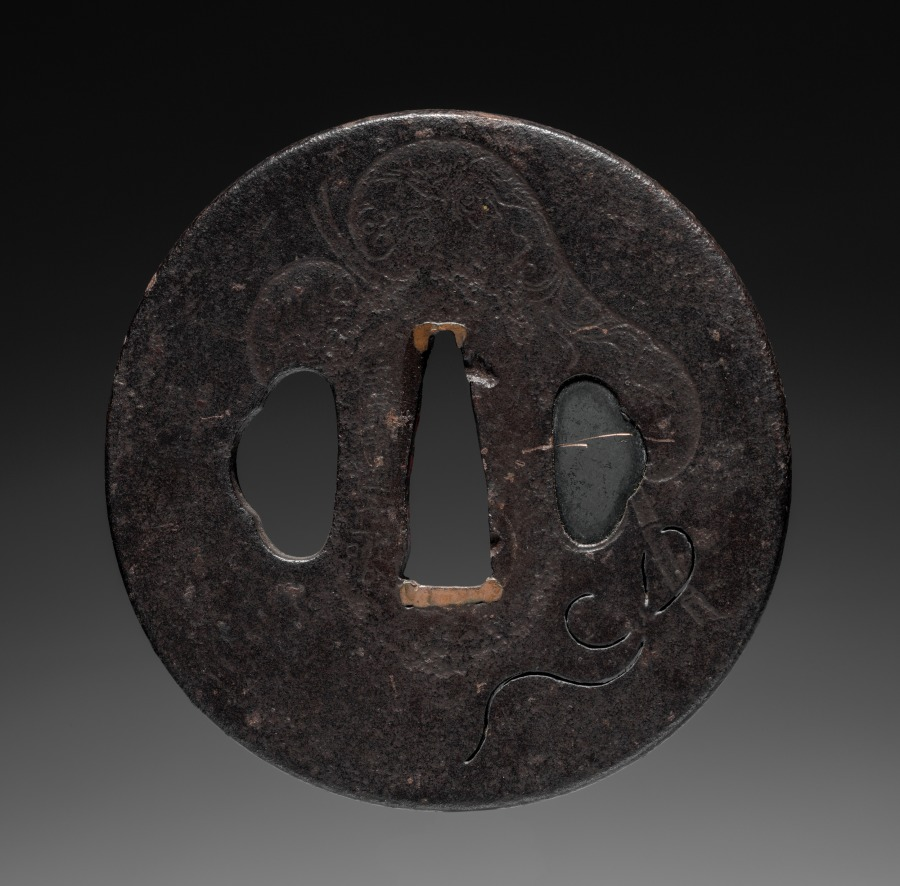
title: Sword Guard (Tsuba) with Fan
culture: Japan, possibly Edo period (1615-1868)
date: c. 1615–1868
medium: iron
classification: Arms and Armor